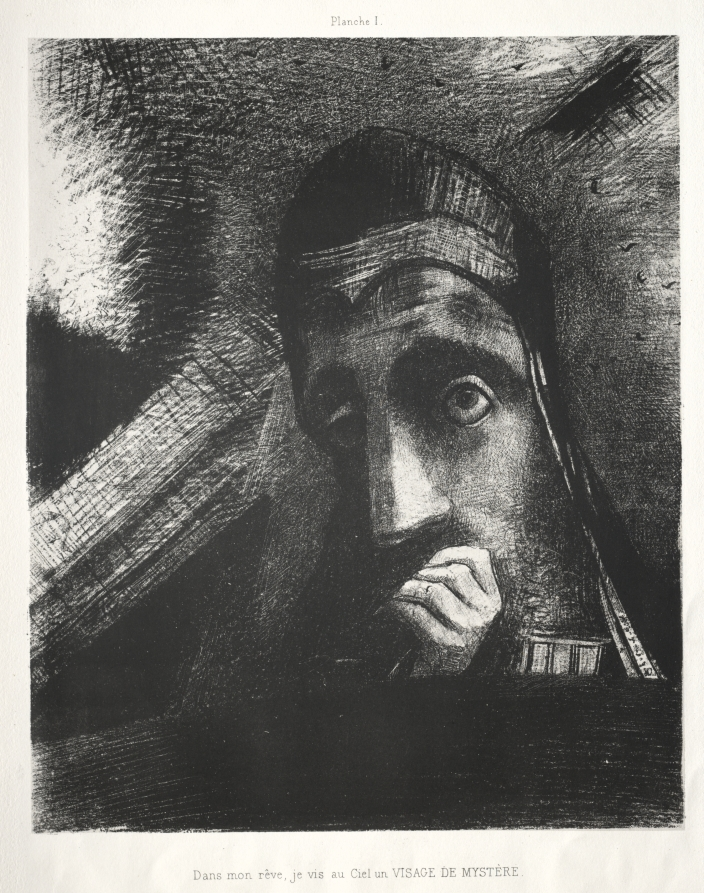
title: In My Dream I Saw in the Sky a Face of Mystery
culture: France, 19th century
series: Homage to Goya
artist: Odilon Redon (French, 1840–1916)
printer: Lemercier & Cie.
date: 1885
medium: lithograph on China paper laid on wove paper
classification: Print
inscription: printed above image at center: Planche I.; below image at center: Dans mon rêve, je vis au Ciel un VISAGE DE MYSTÈRE.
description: This series is one of many that Odilon Redon created throughout his career. Nearly two-thirds of his lithographs took the form of portfolios—prints connected conceptually by a theme or narrative and physically by a folder or binding. Such works were often dispersed over time, but Cleveland was fortunate to acquire several complete sets with their original covers during the 1920s. Dating from Redon’s early experimentation with lithography, Homage to Goya was intended as a tribute to 18th-century Spanish master Francisco de Goya, whose interest in dreams and the subconscious influenced Redon. The six seemingly unrelated images celebrate Goya’s ambiguity and collectively suggest the introspection and isolation of artistic practice.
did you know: This portfolio was published in an edition of 50, one of which Redon sent to poet Stéphane Mallarmé soon after Redon became a frequent participant in a literary salon held regularly at Mallarmé's home.